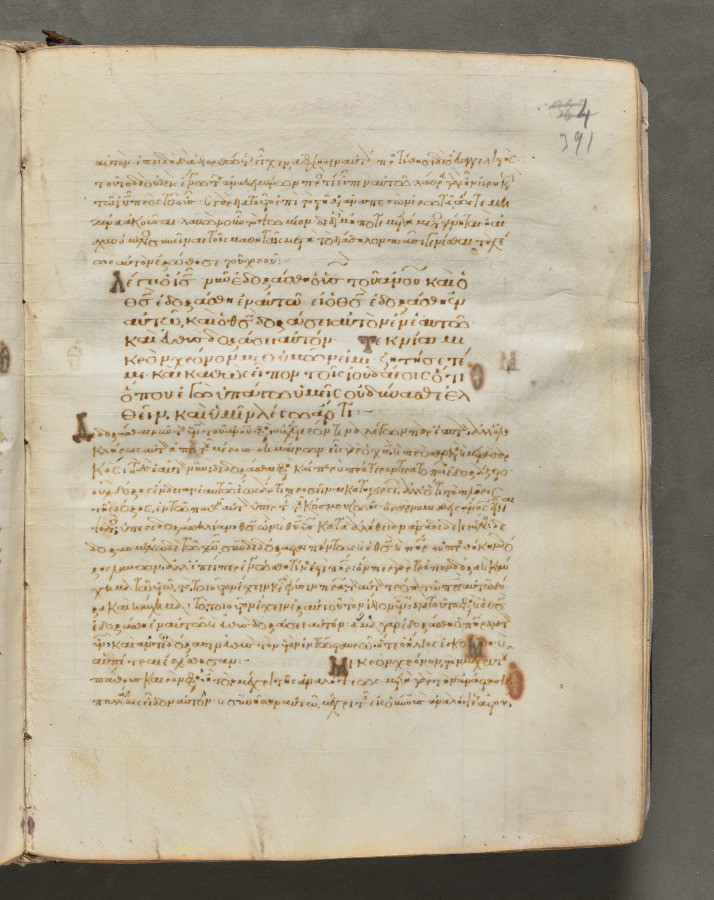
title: Text, folio 391 (recto), from a Gospel Book with Commentaries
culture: Byzantium, Constantinople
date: c. 1000–1100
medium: ink, tempera, and gold on vellum; leather binding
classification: Bound Volume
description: Each of the four gospels in this book opens on a page with brilliantly illuminated borders depicting the author of the text as well as birds—principally peacocks, symbols of the immortality of the soul—and fountains, representing the fountain of life and the salvation of the soul. This volume consists of 428 leaves with texts in Greek. Its level of sophistication suggests that it was probably written and decorated in a monastery in Constantinople.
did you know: Gospel books were carried in procession through Byzantine churches.